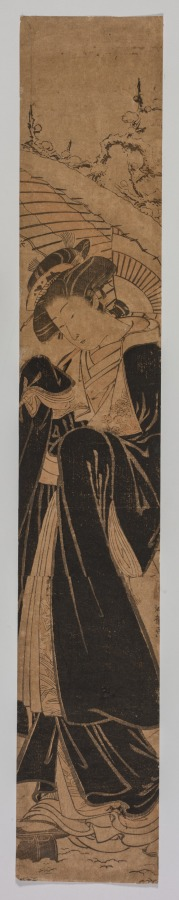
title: Beauty in Snow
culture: Japan, Edo period (1615–1868)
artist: Isoda Koryūsai (Japanese, 1735–1790)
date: 1765–1784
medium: color woodblock print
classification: Print